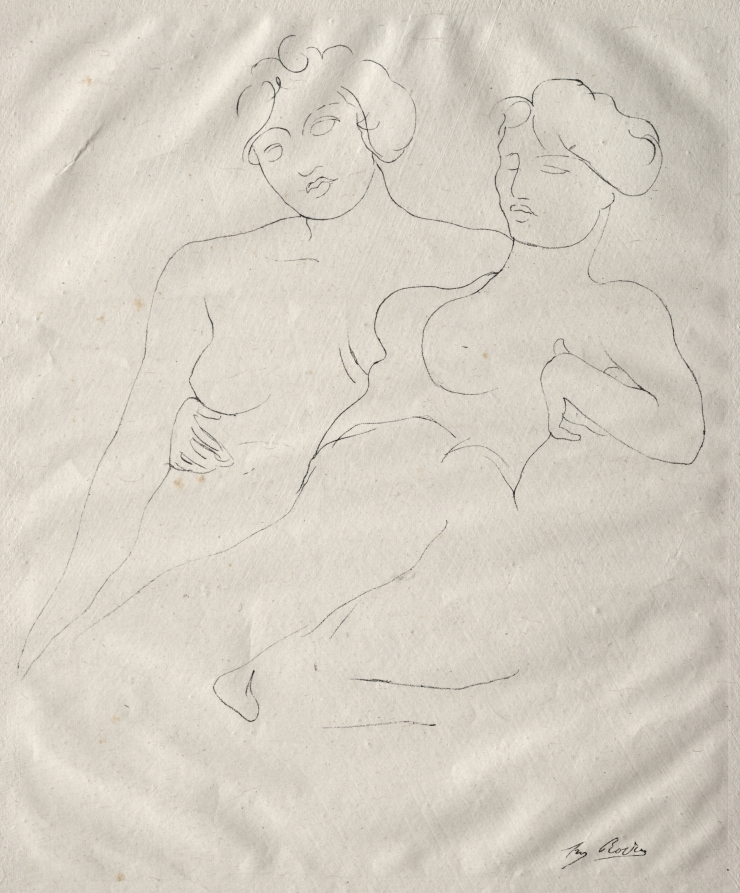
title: Two Figures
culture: France, late 19th-early 20th Century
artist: Auguste Rodin (French, 1840–1917)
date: late 1800s–early 1900s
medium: lithograph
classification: Print